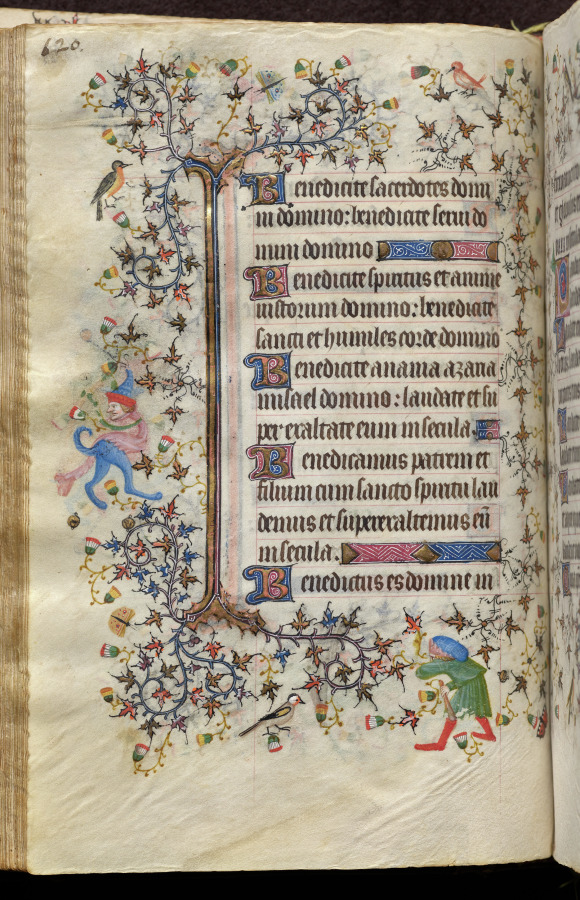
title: Hours of Charles the Noble, King of Navarre (1361-1425): fol. 60v, Text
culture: France, Paris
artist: Master of the Brussels Initials and Associates (French)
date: c. 1405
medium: ink, tempera, and gold on vellum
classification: Bound Volume